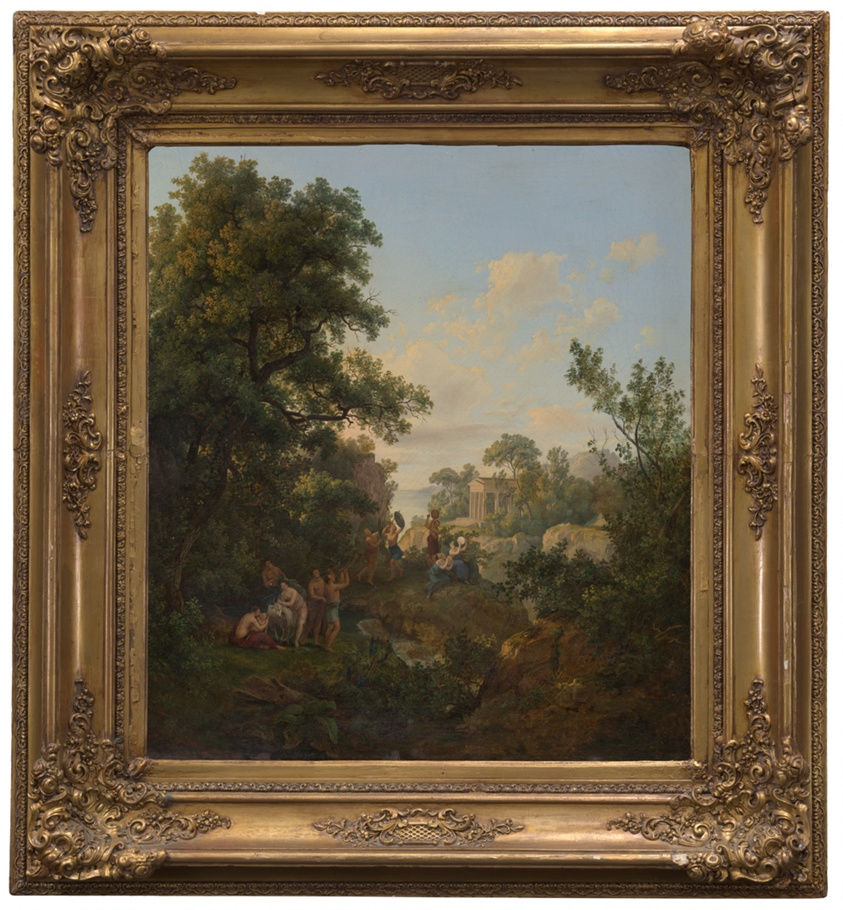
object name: Painting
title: Birth of Bacchus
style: 19th century, romantic, Neoclassicism, hungarian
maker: Károly Markó Sr. (Hungarian, 1793-1860)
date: 1826(?)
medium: Oil on canvas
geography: Hungary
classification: painting; european painting; oil; oil on canvas; paint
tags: landscape, classical, Greek mythology, mythological figures, mythology